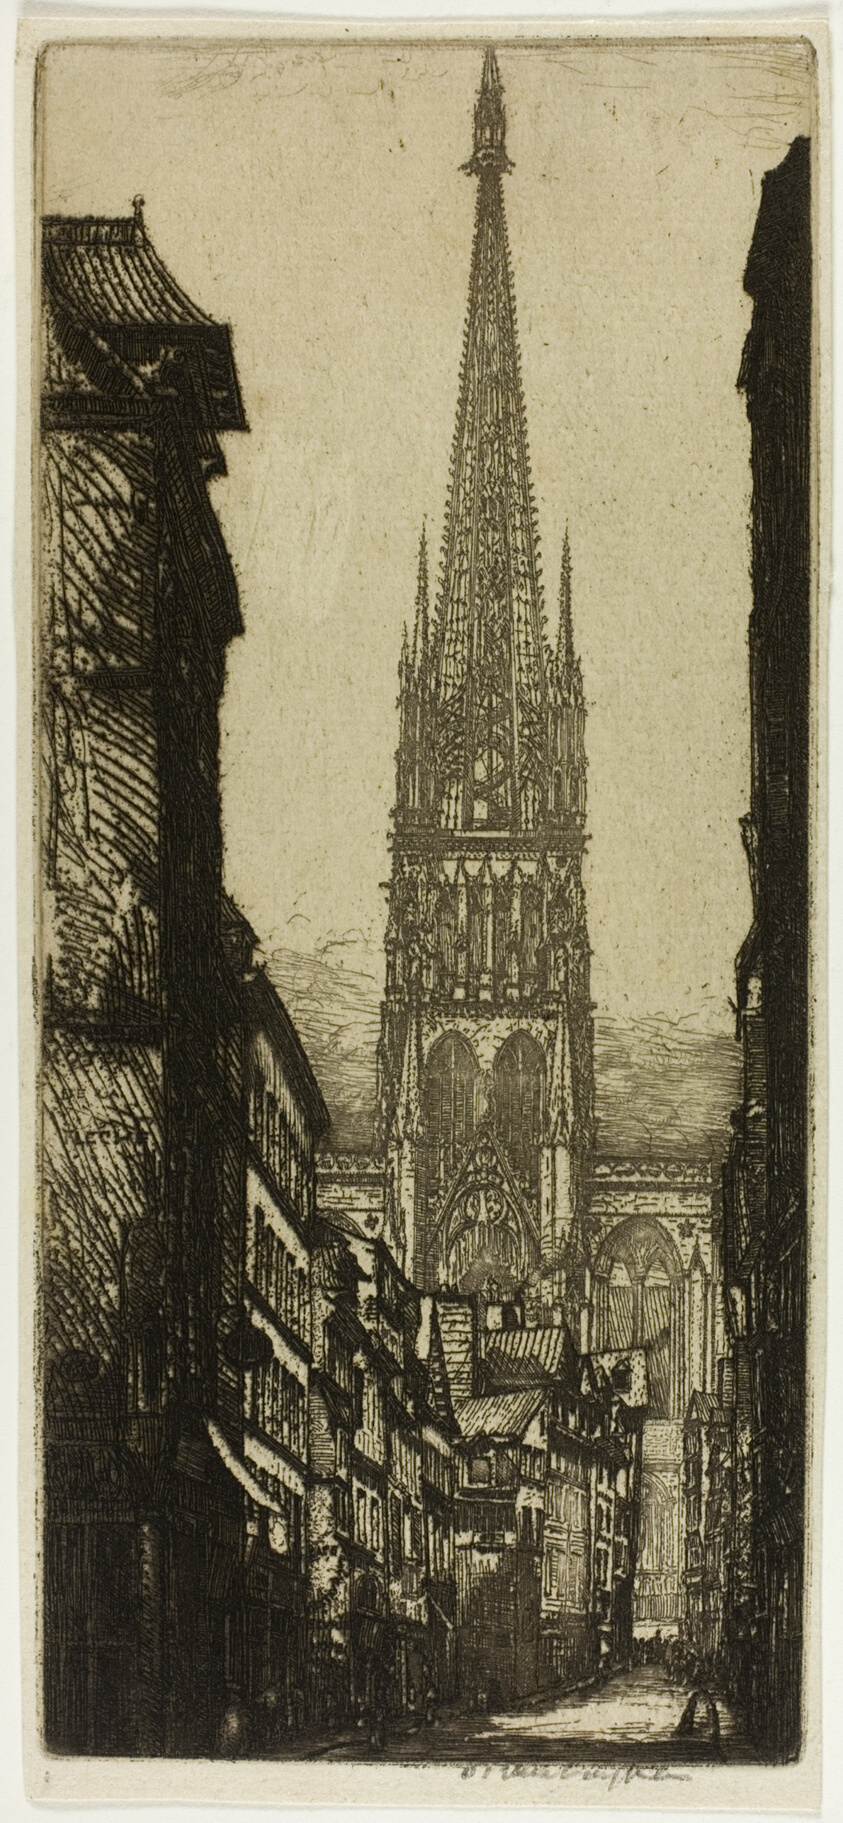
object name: Print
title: La Flêche, Rouen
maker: Donald Shaw MacLaughlan (American, born Canada, 1876-1938)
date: 1903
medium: Etching in black on ivory laid paper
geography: United States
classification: etching; print; prints and drawing